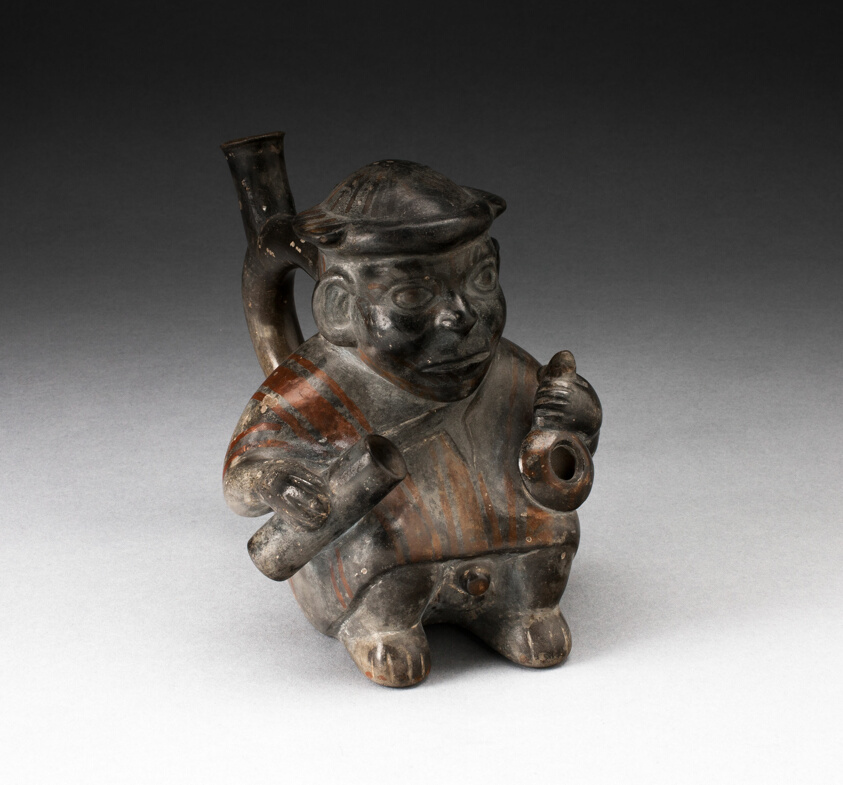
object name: Vessel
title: Handle Spout Vessel in the Form of a Figure Holding Corn Popper and Rolled Mat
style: moche, mochica, early intermediate period, Pre-Columbian, americas, Arts of the Americas, andean, andes, south american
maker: Moche (North coast, Peru)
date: 100 BCE–500 CE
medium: Ceramic and pigment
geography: Peruvian North Coast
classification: earthenware; ceramics; vessel; art of the americas